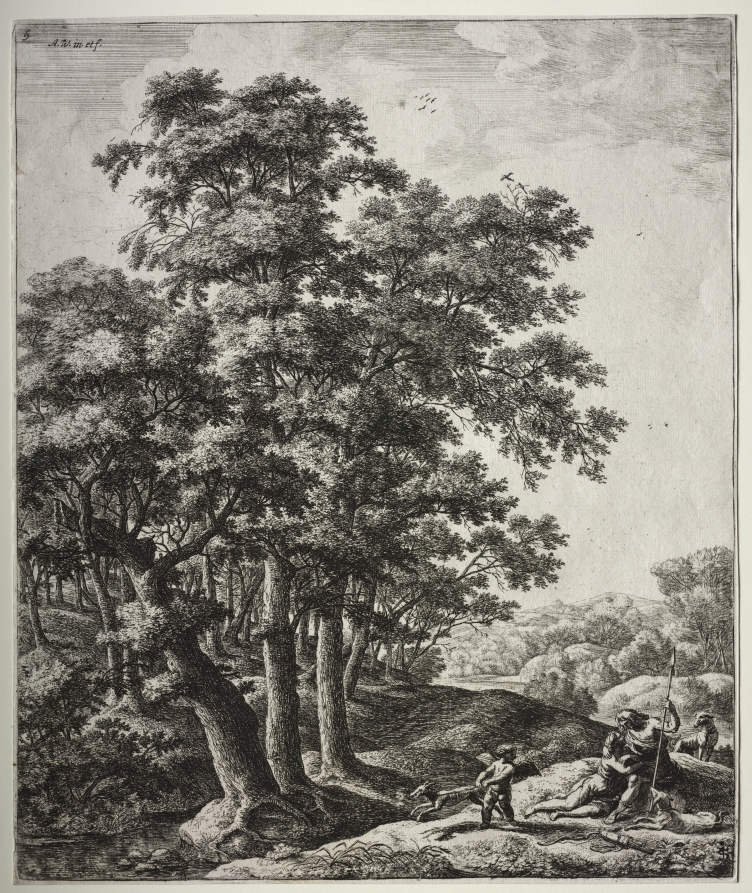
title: Six large upright landscapes with scenes from Ovid's Metamorphoses: Venus and Adonis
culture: Netherlands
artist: Anthonie Waterloo (Dutch, 1609/10–1690)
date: 1640–90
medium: etching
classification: Print